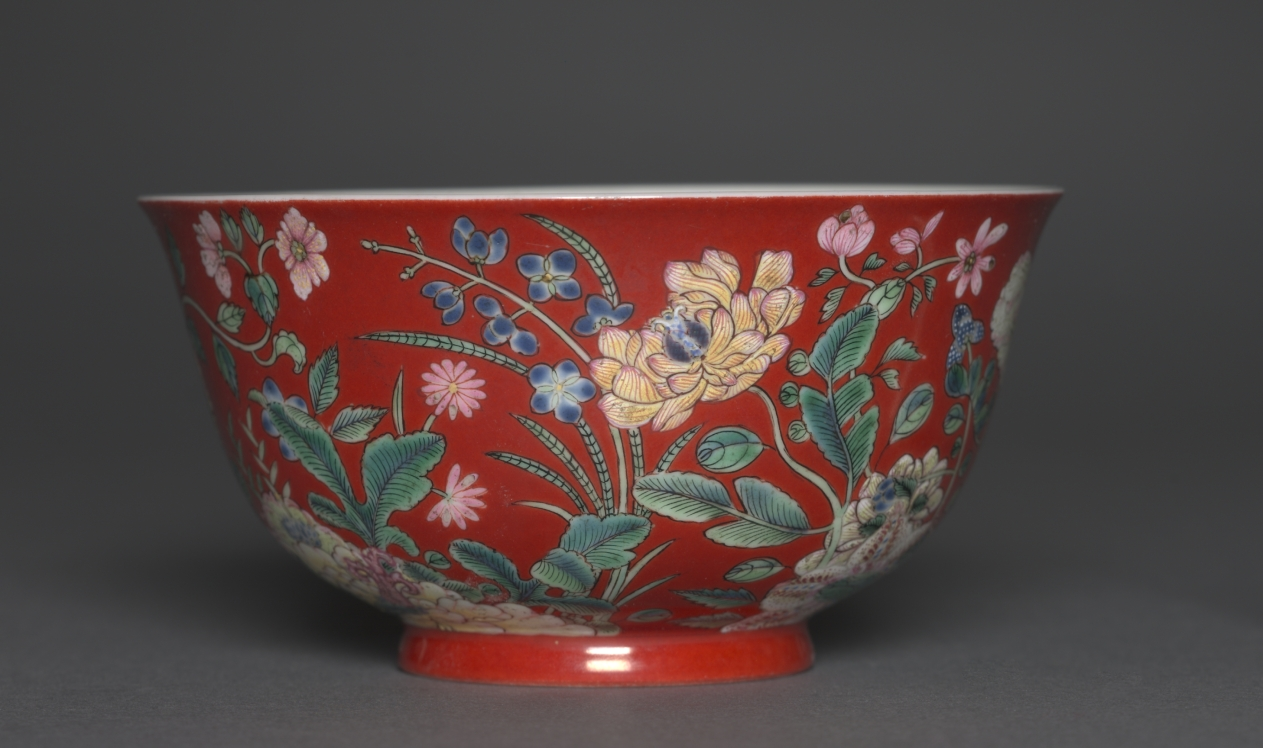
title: Bowl with Flowering Plants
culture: China, Jiangxi province, Jingdezhen, Qing dynasty (1644–1911), Yongzheng mark and reign (1723–35)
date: 1723–35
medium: porcelain with overglaze enamel decoration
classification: Ceramic